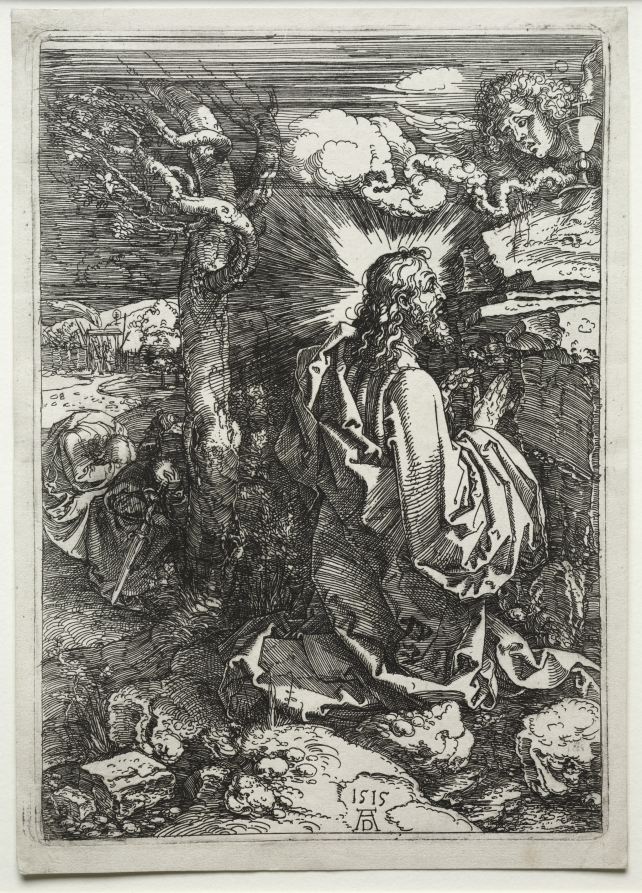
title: Christ on the Mount of Olives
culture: Germany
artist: Albrecht Dürer (German, 1471–1528)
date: 1515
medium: etching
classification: Print